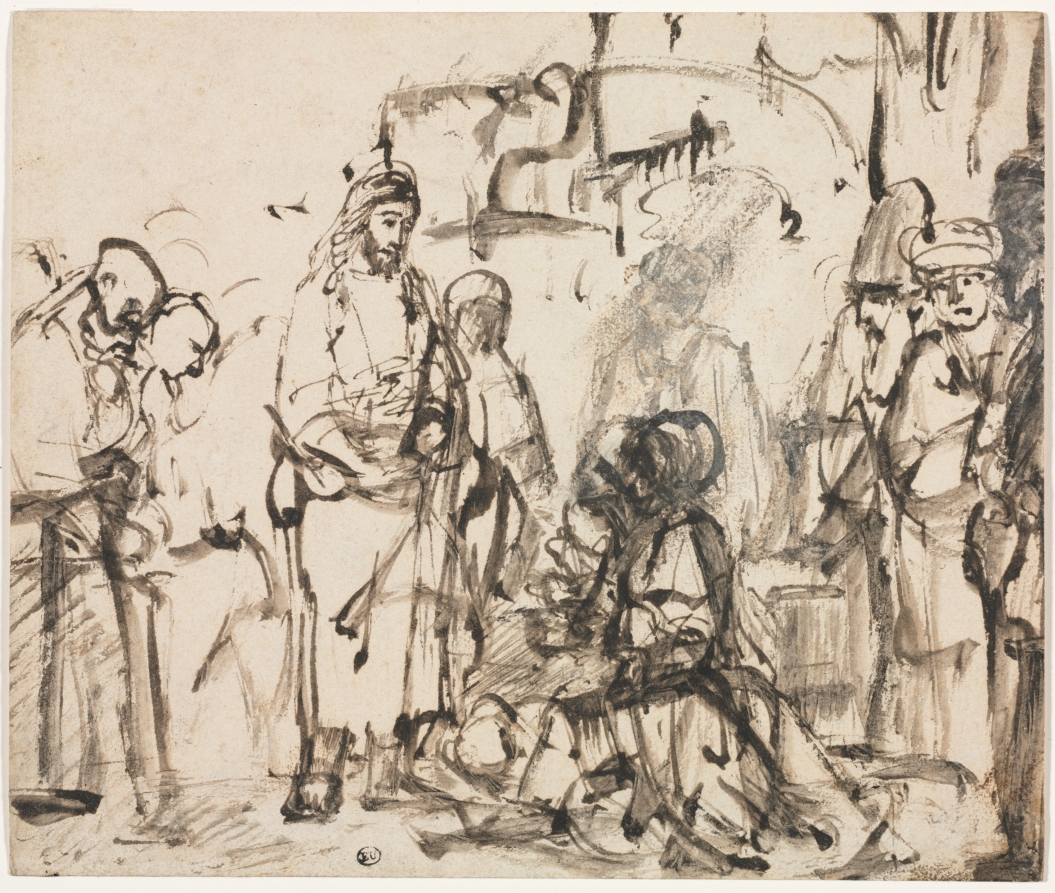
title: The Meeting of Christ with Martha and Mary after the Death of Lazarus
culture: Netherlands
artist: Rembrandt van Rijn (Dutch, 1606–1669)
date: c. 1662–65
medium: reed pen and brown ink and wash, heightened with white gouache (in the heads of the kneeling figures)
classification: Drawing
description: Scholars now consider this drawing a rare, late work by Rembrandt. Here, Christ meets with Martha and Mary after the death of their brother, Lazarus (John 11:30–36). The composed dignity of Christ's face and his calm compassion contrast with the prostrate figure of Mary and the agitated drawing of the kneeling Martha, whose outstretched hands are repeated three times, suggesting a frenzied expressivity. Above Martha, white gouache obliterates the figure of a standing man as well as a first version of Martha's head. The combination of rough power and sublime tenderness that characterizes Rembrandt's late drawing style is here demonstrated in the dramatic rendering of the sisters' grief and the sensitive portrayal of the bearded old man who dries his eyes with a kerchief at the right.